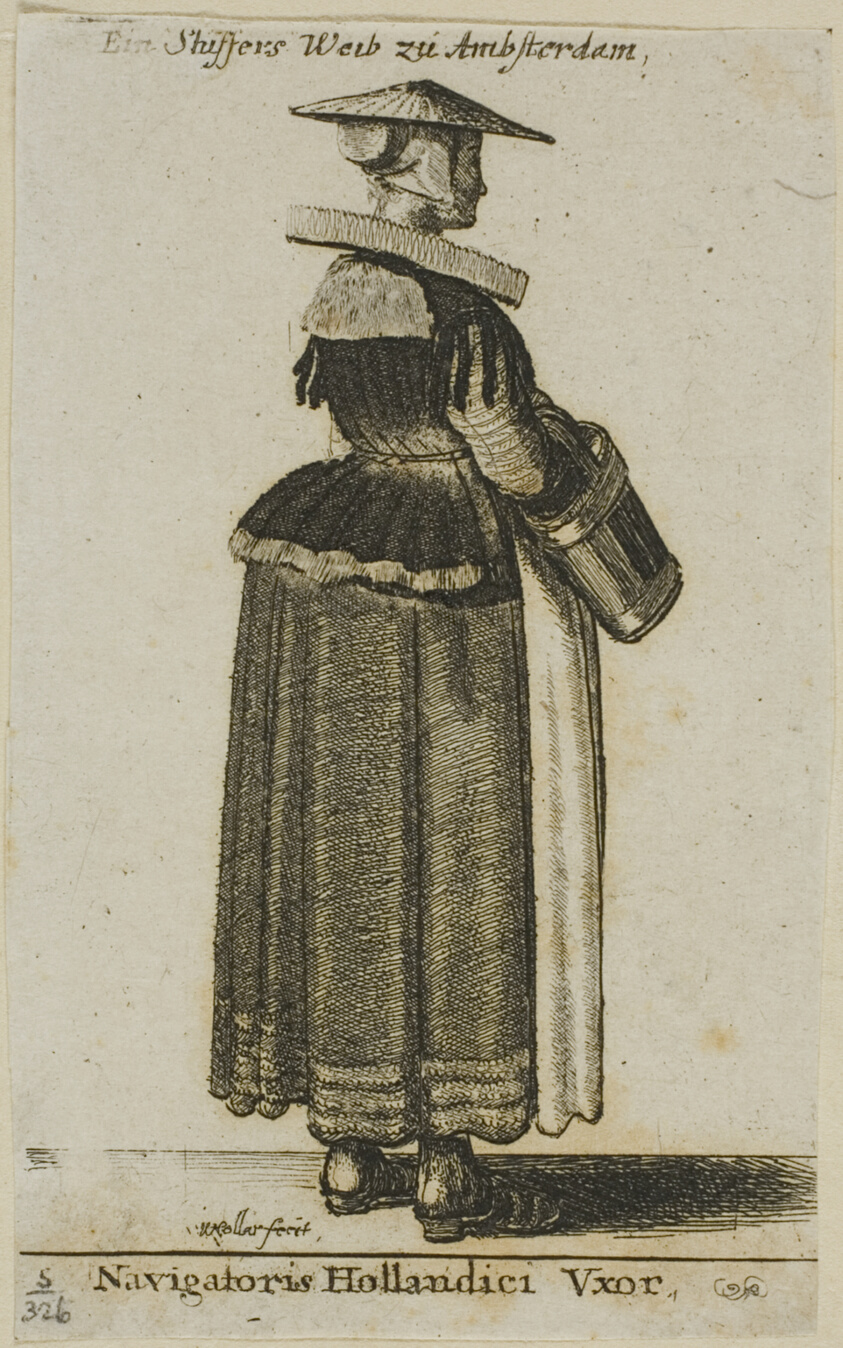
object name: Print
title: Dutch Sailor's Wife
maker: Wenceslaus Hollar (Bohemian, 1607-1677)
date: 1644–50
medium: Etching on gray Asian paper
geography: Bohemia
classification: etching; print; prints and drawing